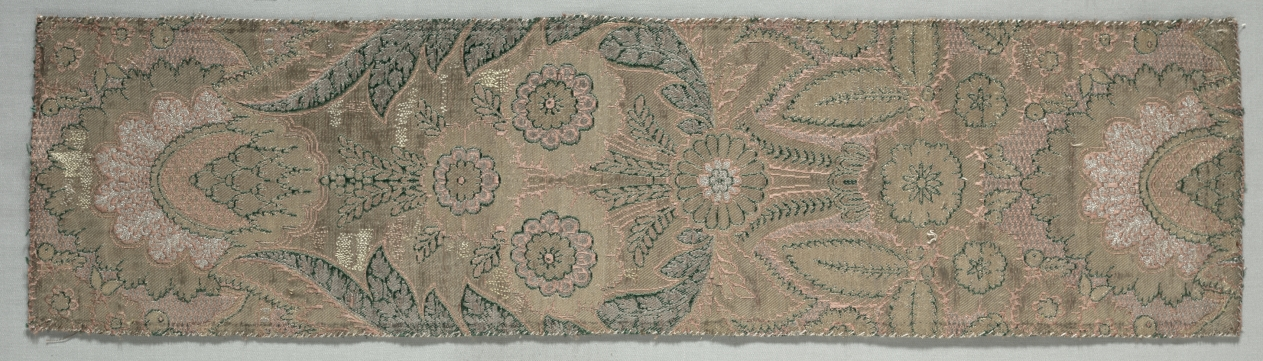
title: Brocade Textile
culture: Italy, early 18th Century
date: c. 1700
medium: brocade; silk and metal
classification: Textile